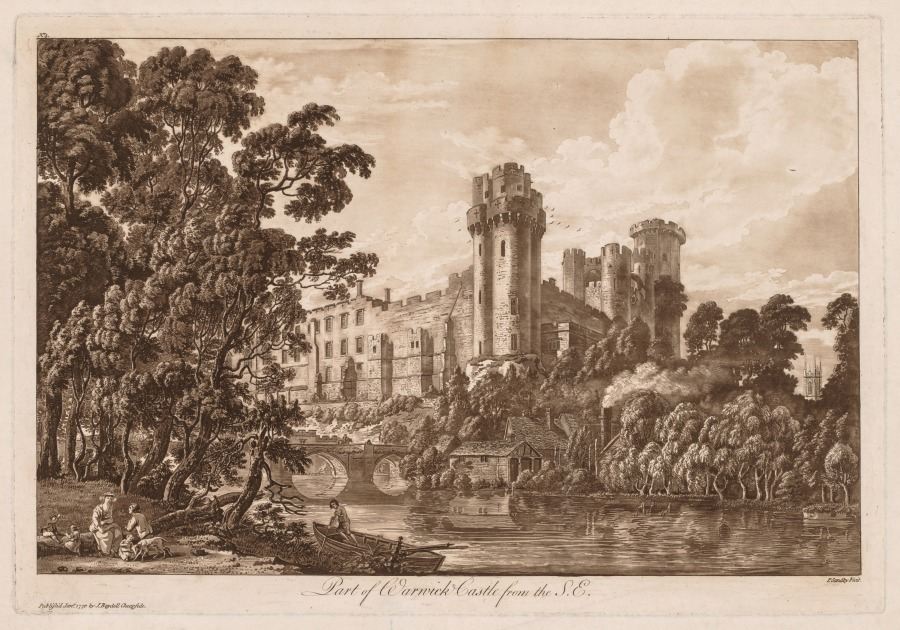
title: Views of Warwick Castle: Part of Warwick Castle from the South East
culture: England, 18th century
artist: Paul Sandby (British, 1731–1809)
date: 1776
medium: etching and aquatint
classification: Print